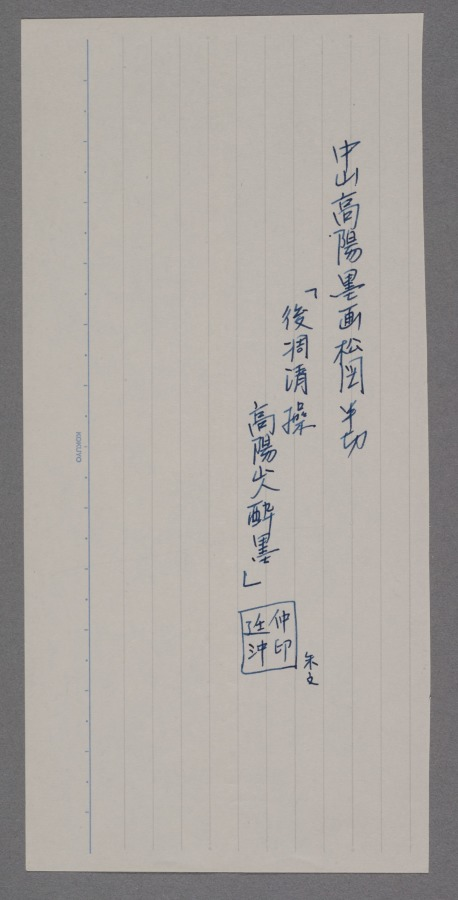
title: Aged Pine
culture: Japan, Edo period (1615–1868)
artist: Nakayama Kōyō (Japanese, 1717–1780)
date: 1717–80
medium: hanging scroll; ink on paper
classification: Painting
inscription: Artist's inscription and seal, lower right.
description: The ancient pine is an admired subject in Asian painting and symbolizes the desirable human qualities of wisdom and solid moral character.